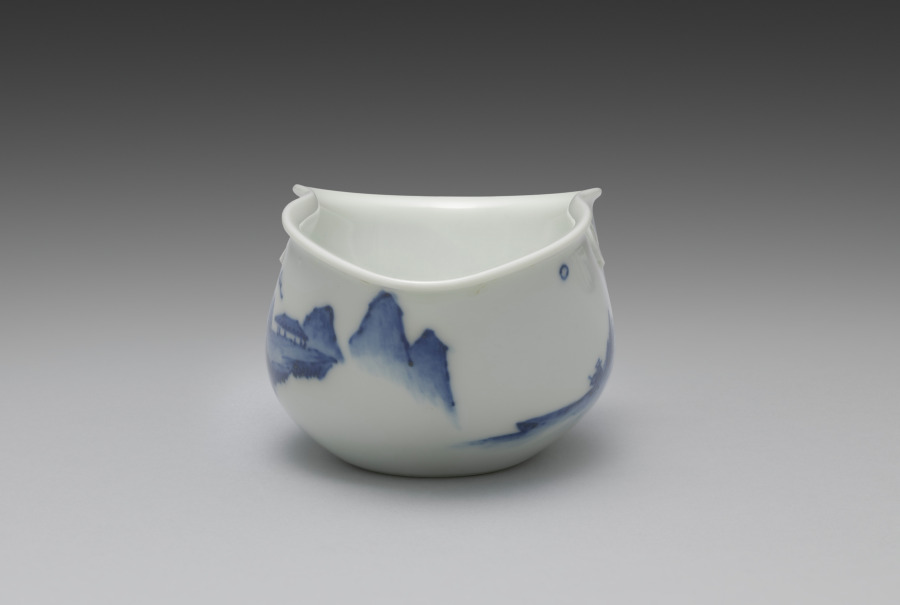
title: Water Cooler from Tea Set with Chinese Landscape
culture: Japan, Meiji period (1868–1912)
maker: Seifū Yohei III (Japanese, 1851–1914)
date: 1893–1914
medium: Porcelain with underglaze blue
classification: Ceramic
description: The kidney-shaped water cooler, yuzamashi, has a scene of a man gazing at a full moon in a dramatic mountain-scape stretching before a large compound in the woods. Another man, hunched over and carrying a heavy parcel tied to a pole over his shoulder, struggles to make his way up a hill to the site. The cooler also has a pair of applied nyoi staff-head forms for resting the tips of one’s thumb and index finger.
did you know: This is a yuzamashi, a container used to cool boiled water to just the right temperature for the best flavor when steeping.